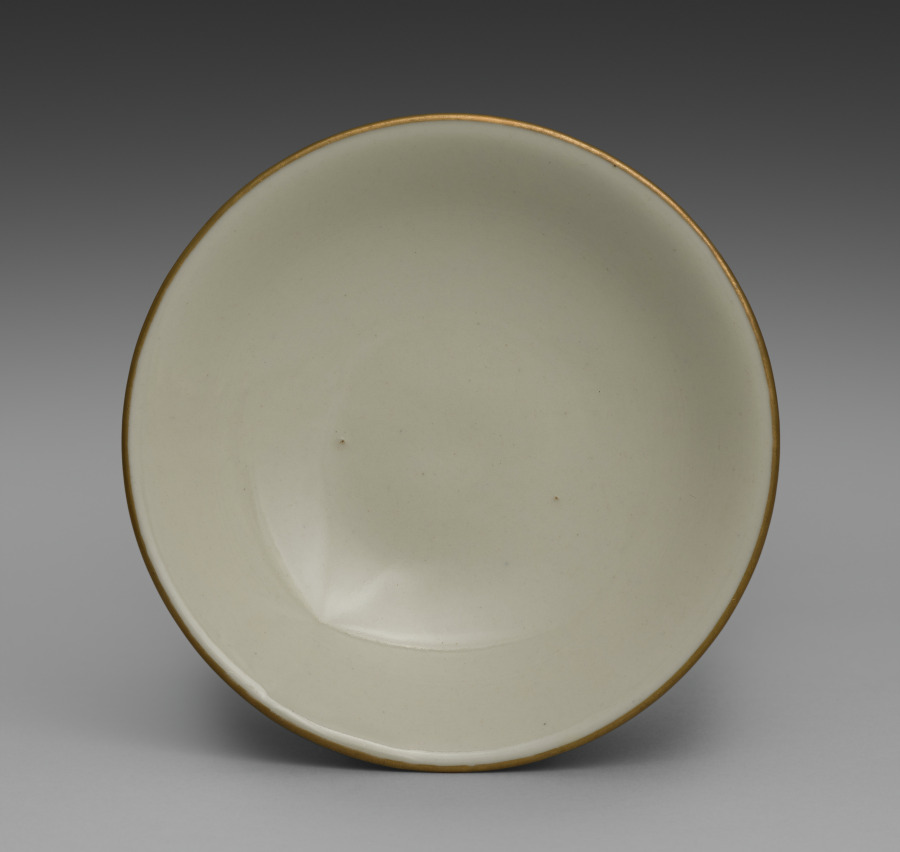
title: Cover for a Bowl from Dining Set with Plum Blossoms and Cracked-Ice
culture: Japan, Meiji period (1868–1912)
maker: Seifū Yohei II (Japanese, 1844–1878)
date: c. 1875–78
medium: Porcelain with molded designs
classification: Ceramic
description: Each item in this set has a delicate low-relief design of flowering plum branches over scattered, intersecting lines meant to resemble the cracked-ice surface of a frozen body of water and is signed on the base in gold pigment. While Yohei II produced many fine works in underglaze blue, like those produced by Kiyomizu Shichibei, he also made works in quite different styles later in his career, from the early 1870 s. In 1873, he was appointed purveyor to the Industrial Center of Kyoto Prefecture, a designation associated with Kyoto’s efforts to reach an international market through the port of Kobe; and from 1875 until his death, he was involved in national-level projects to present Japanese ceramics across the world. It was during this period that Yohei III was apprenticed to Yohei II, and it has been suggested that this set may in fact be an early example of Yohei III’s work, which he signed with his teacher’s name. Decorated with flowers resembling Japanese textile motifs, the set calls to mind the design of Yohei II’s pair of vases with plum blossoms in the Victoria and Albert Museum. Here, the elaborate trees created for a formal public exhibition setting have been translated into the approachable blossoms of the genteel domestic environment. While the designs are consistent across the pieces, each raised flower petal and pistil and each incised line in the ice was done by hand, so the cups, bowls, and dishes are similar yet unique. The bottoms of two boxes once identified the set’s owner, but the information has been deliberately obscured with black ink. However, inscriptions still visible appear to indicate two occasions, once at the end of July 1886 , and once again in June 1916 , when parts of the set were requested from Hokura in Niigata Prefecture. The location corresponds to a neighborhood in the present-day city of Jōetsu. The surname Tsuji 辻 also appears on a paper tag affixed to one of the box cloths. Future research may possibly reveal more about their provenance. A vase by Yohei III in a private collection combines the formal grandeur of the Yohei II vases in the Victoria and Albert Museum with the gentler design of this dining set, placing flowering plum trees against soft, scalloped-edge clouds resembling those in golden screens.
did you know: The dining wares have a creamy white coloration that the four boxes containing them identify as Korean in style.